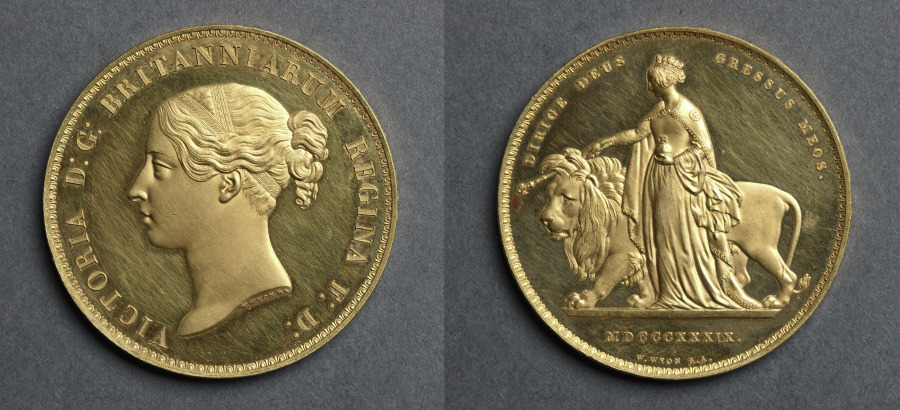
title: Five Pound Piece: Victoria (obverse); Una (reverse)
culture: England, Victoria, 1837-1901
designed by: William Wyon (British, 1795–1851)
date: 1839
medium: gold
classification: Coins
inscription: VICTORIA D: G: BRITANNIARUM REGINA F: D:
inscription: DIRIGE DEUS GRESSUS MEOS; MDCCCXXXIX; W. WYON R.A.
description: This piece was struck by the Royal Mint from gold purchased for the purpose. The current gold coins, such as the sovereign, were struck from gold supplied by the Bank of England. The larger gold pieces have their origins in the five and two guinea pieces. There are several minor varieties of this fine and rare piece, designed by William Wyon, R.A., a member of the celebrated family, still in existence, that had such a long and profound influence on British coin design. By some, this piece was considered to be too medallic for coinage purposes. Queen Victoria, at this date a young woman of 20, is shown as Una, Truth, because truth is one: one of the principal characters in Spenser's Faerie Queene (1590–1611). She is leading the lion referred to in her adventures in Spenser's work. It is often also referred to as the British lion. This coin is considered by many to be one of the most beautiful in the English series, and the standard of workmanship and striking has never been improved upon.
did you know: This five-pound piece was never for circulation but instead for presentation and collectors.